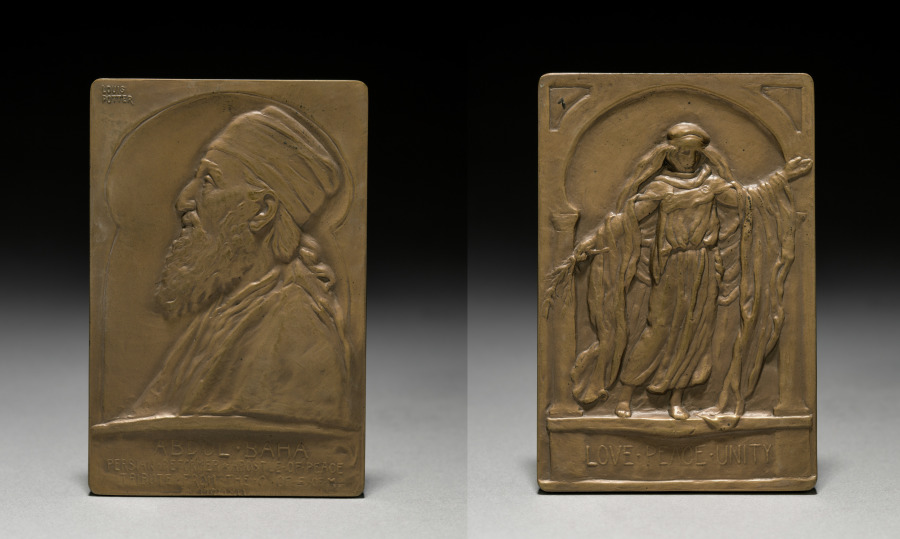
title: Medal: Abdul Baha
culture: America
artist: Louis McClellan Potter (American, 1873–1912)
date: 1912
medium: bronze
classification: Metalwork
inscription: upper left-hand corner: "LOUIS POTTER"; below, center: "ABDUL . BAHA/ PERSIAN REFORMER. APOSTLE OF PEACE/ TRIBUTE FROM THE C. OF F. OF M./MCMXII."